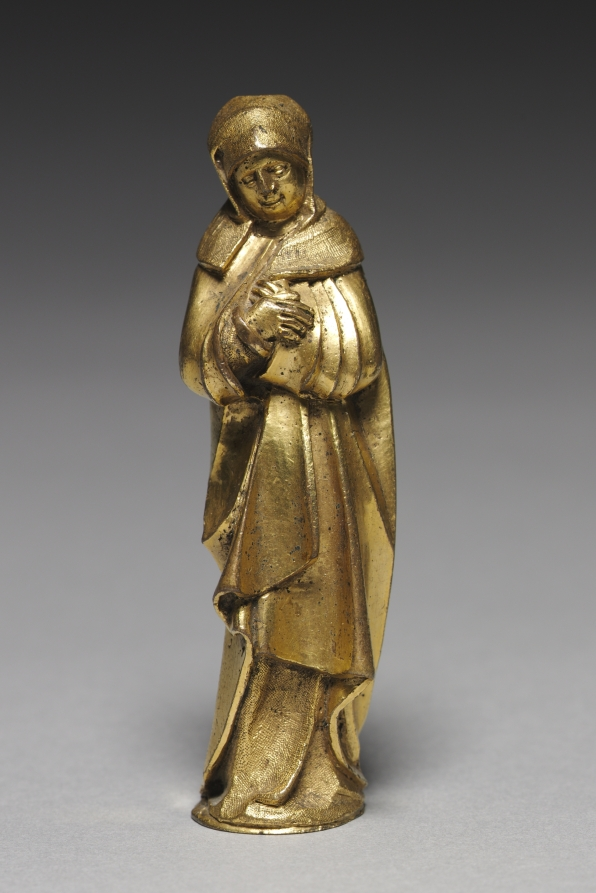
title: Mourning Virgin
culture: Germany, Franconia, late 15th century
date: late 1400s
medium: gilt bronze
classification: Sculpture